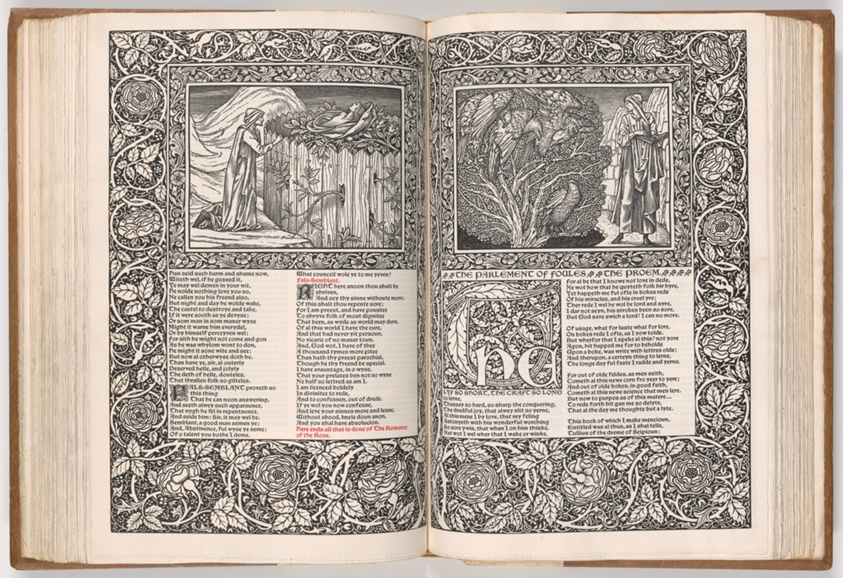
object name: Book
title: The Works of Geoffrey Chaucer Now Newly Imprinted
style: Arts and Crafts Movement, 19th century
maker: William Morris (English, 1834–1896); Illustrated by Sir Edward Burne-Jones (English, 1833-1898); Engraved by William Harcourt Hooper (English, 1834-1912)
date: 1896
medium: Hand-printed book on Batchelor linen paper, bound with tooled white pigskin on oak board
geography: England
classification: book; ink on paper